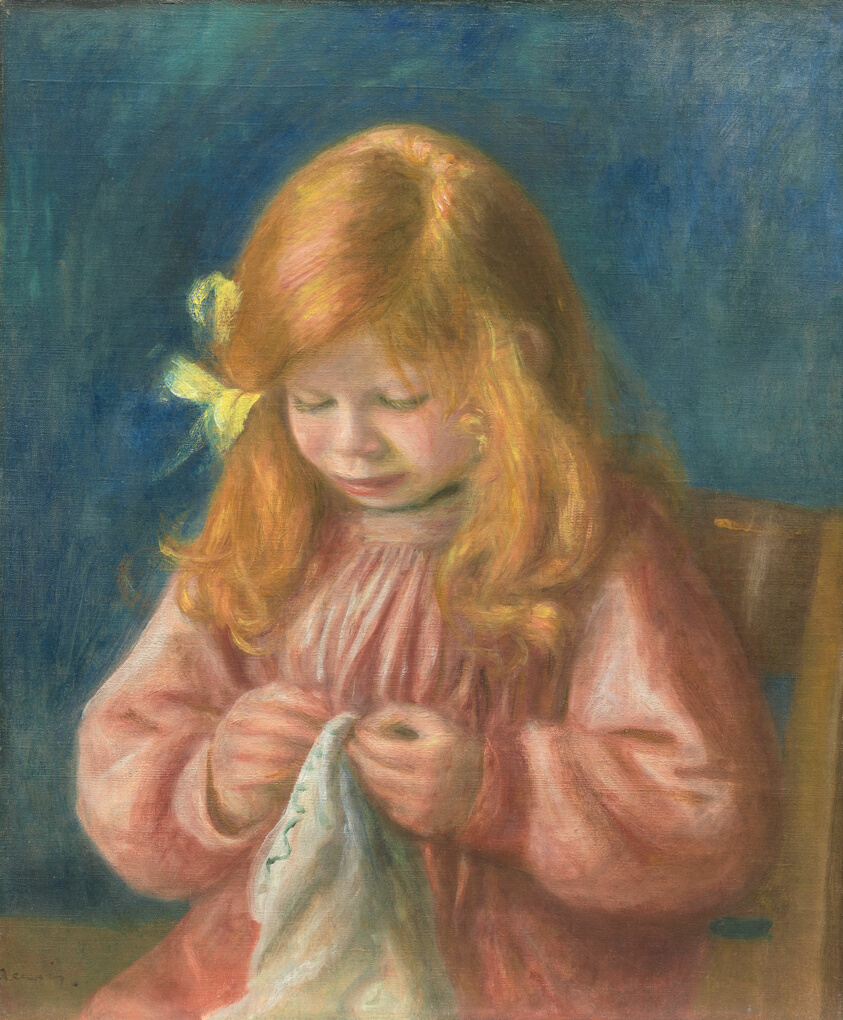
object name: Painting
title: Jean Renoir Sewing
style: Impressionism, nineteenth century, 19th century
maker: Pierre-Auguste Renoir (French, 1841–1919)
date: 1899–1900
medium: Oil on canvas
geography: France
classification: oil on canvas; portrait; paint; oil paintings (visual works); french; painting; european painting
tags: children, yellow (color), sewing, portraits: female subject, portraits: child subject, portrait, pink (color), chair, blue (color), blue, sons, families, portraits